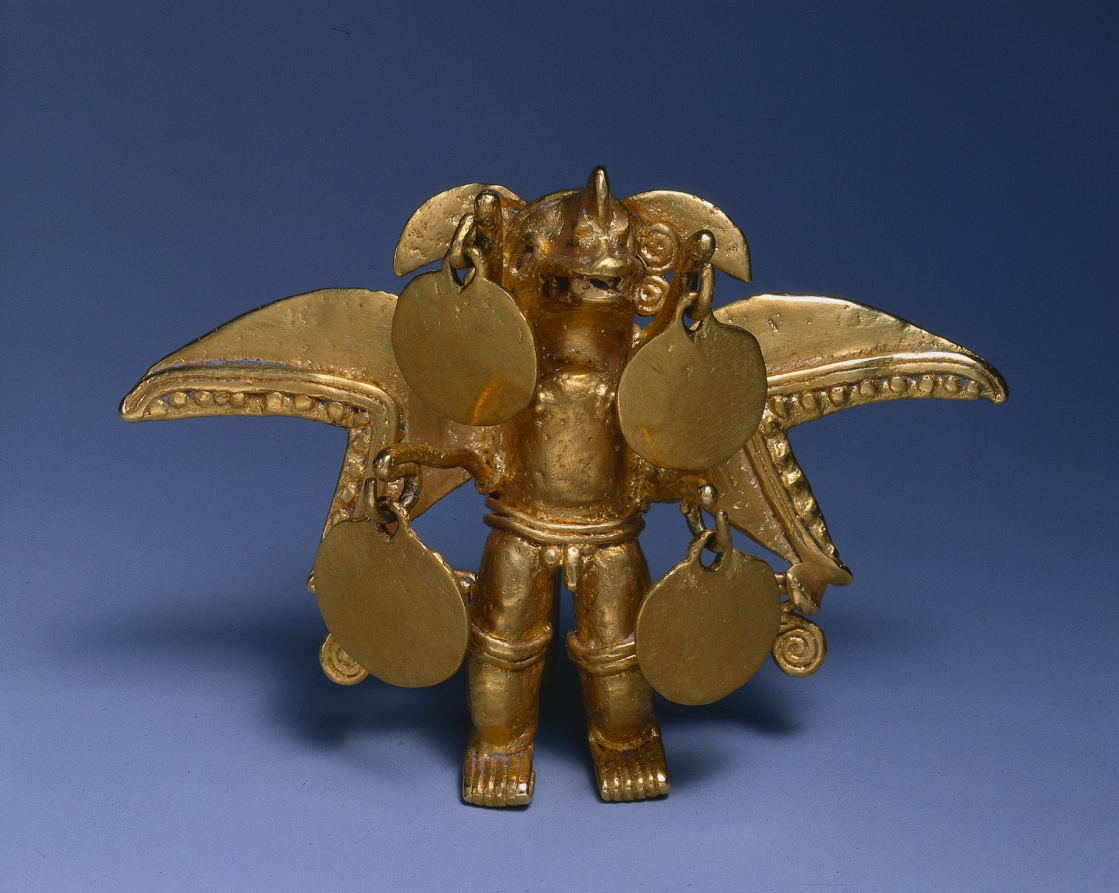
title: Winged Figure Pendant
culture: Southern Costa Rica, (Diquís Region), Diquís Style, 11th-16th century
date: c. 1000–1550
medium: cast and hammered gold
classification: Metalwork